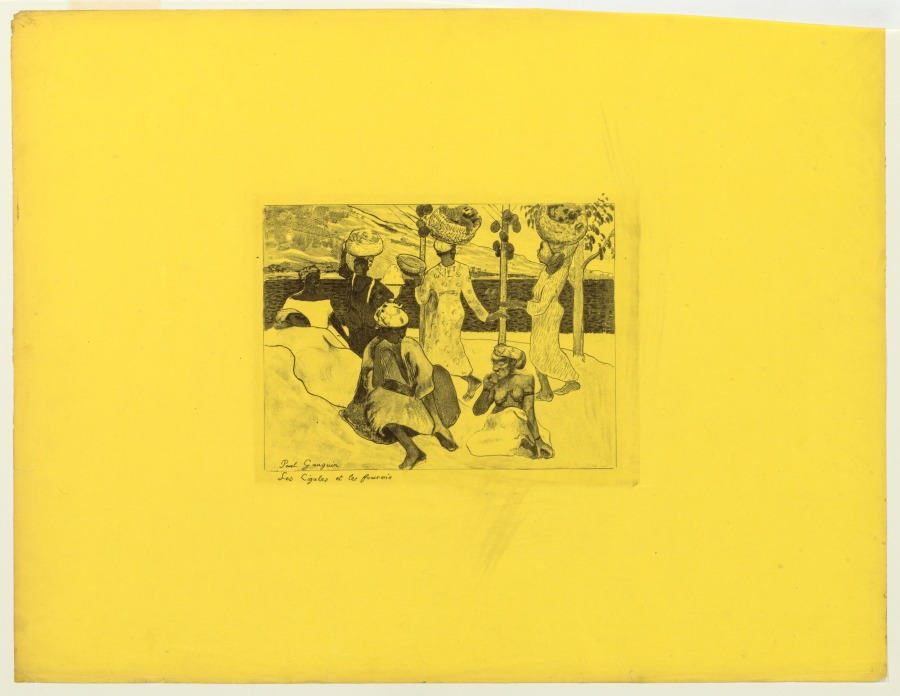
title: Volpini Suite: The Grasshoppers and the Ants (Les Cigales et les Fourmis)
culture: France, 19th century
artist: Paul Gauguin (French, 1848–1903)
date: 1889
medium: zincograph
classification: Print